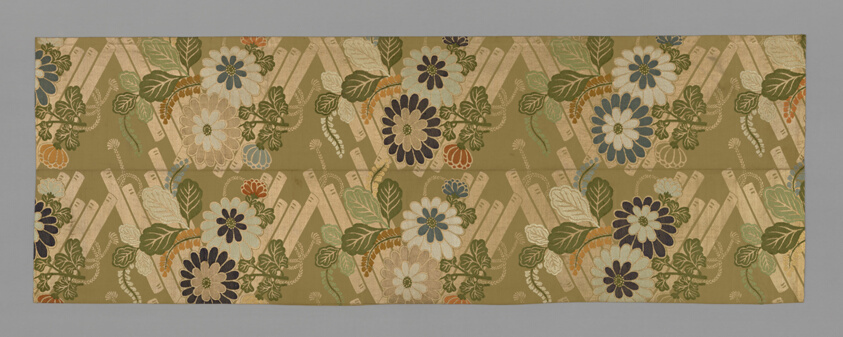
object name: Costume and Accessories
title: Obi (Belt)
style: late edo, meiji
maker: Japan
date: 18th/19th century, late Edo period (1789–1868)/ Meiji period (1868–1912)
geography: Japan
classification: textile; weaving; costume; obi (sash)